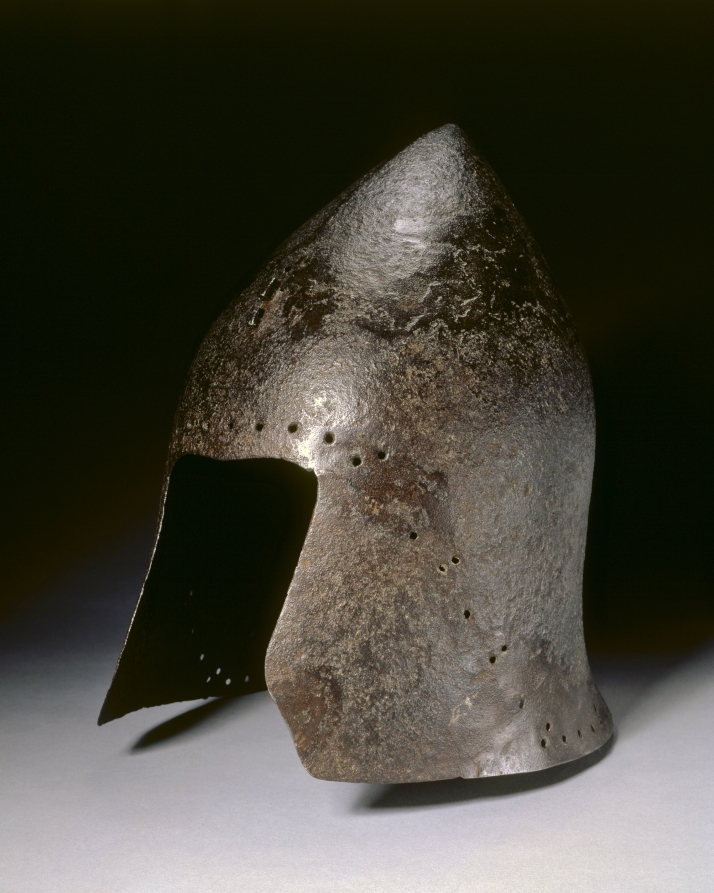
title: Barbute (from the Venetian Garrison at Chalcis)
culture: North Italy, 14th-15th century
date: c. 1350–1420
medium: iron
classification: Arms and Armor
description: This is a rare example of a type of helmet used from about 1350 to 1480. Its conical shape deflected glancing blows to the head. Italian chronicles refer to professional men-at-arms as barbuti. The word derives from the Italian barba, or beard, a reference to the hood of mail often attached to these early helmets. The row of small holes along the face opening and neck were for the attachment of the hood and lining.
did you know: This helmet and a number of others were apparently excavated from the Venetian garrison at Chalcis on the Greek island of Euboea.